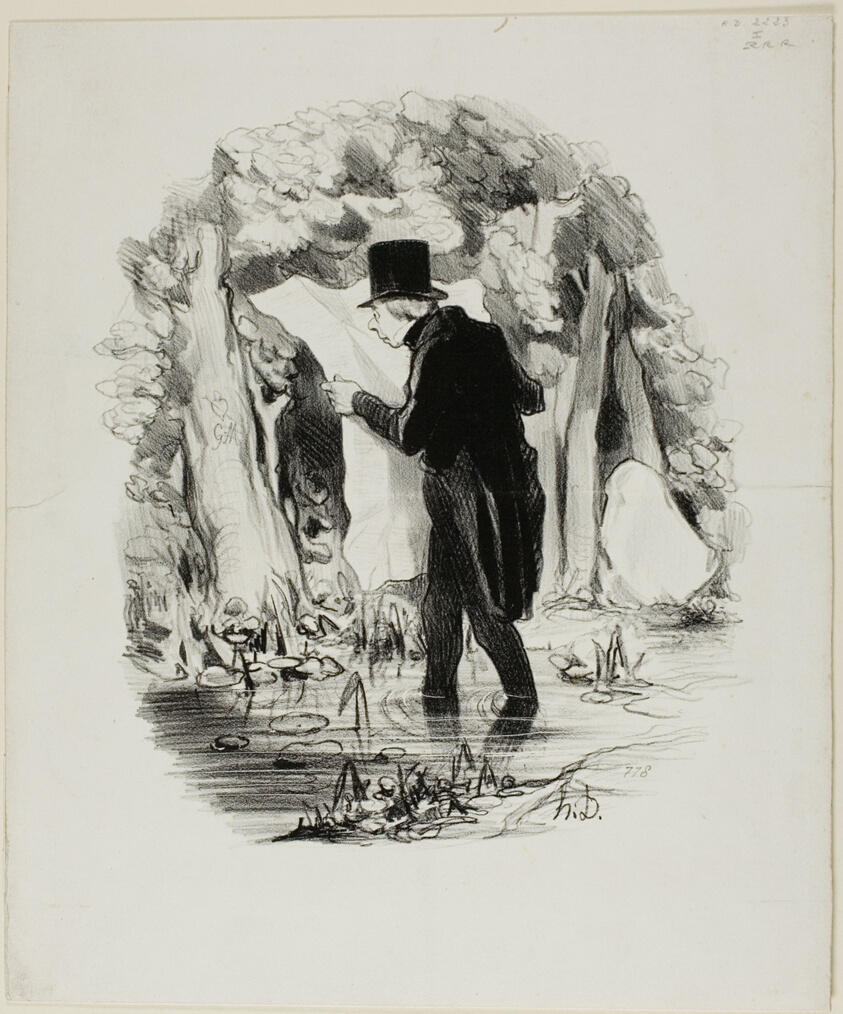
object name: Print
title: This is Where the Lecture of the Constitutionnel Might Take You, plate 8 from Pastorales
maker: Honoré Victorin Daumier (French, 1808-1879); printed by Aubert & Cie. (French, active 19th century); later published in Le Charivari (French,1832-1915)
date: 1845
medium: Lithograph in black on white wove paper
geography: France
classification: lithograph; print; prints and drawing